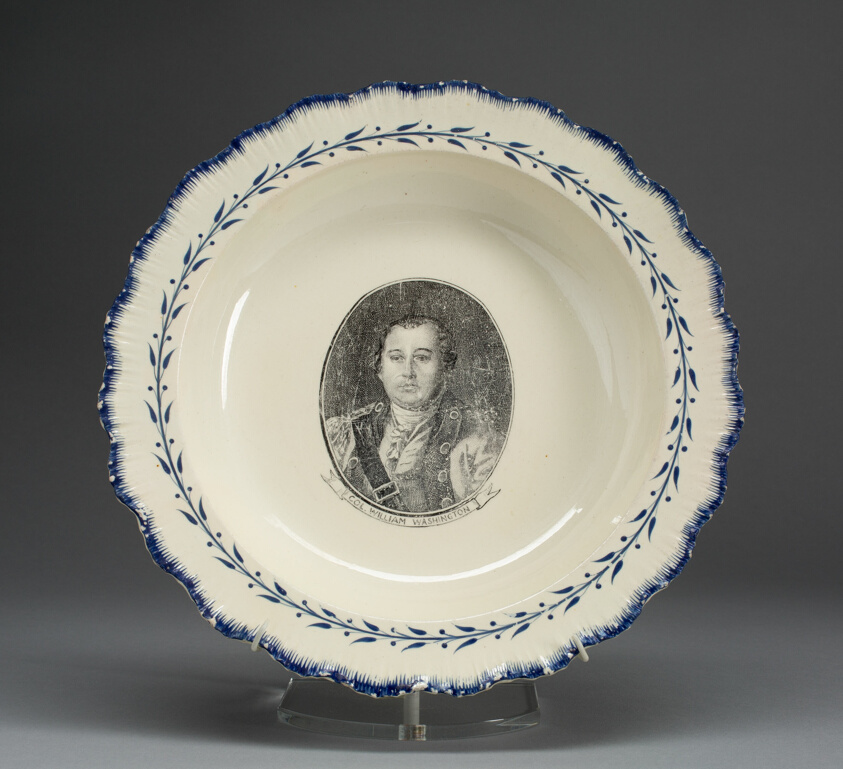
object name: Decorative Arts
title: Soup Plate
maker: English for the American market; Leeds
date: c. 1790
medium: Creamware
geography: England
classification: plate (general, dish); tableware; american decorative arts; porcelain; european decorative arts; ceramics; decorative arts